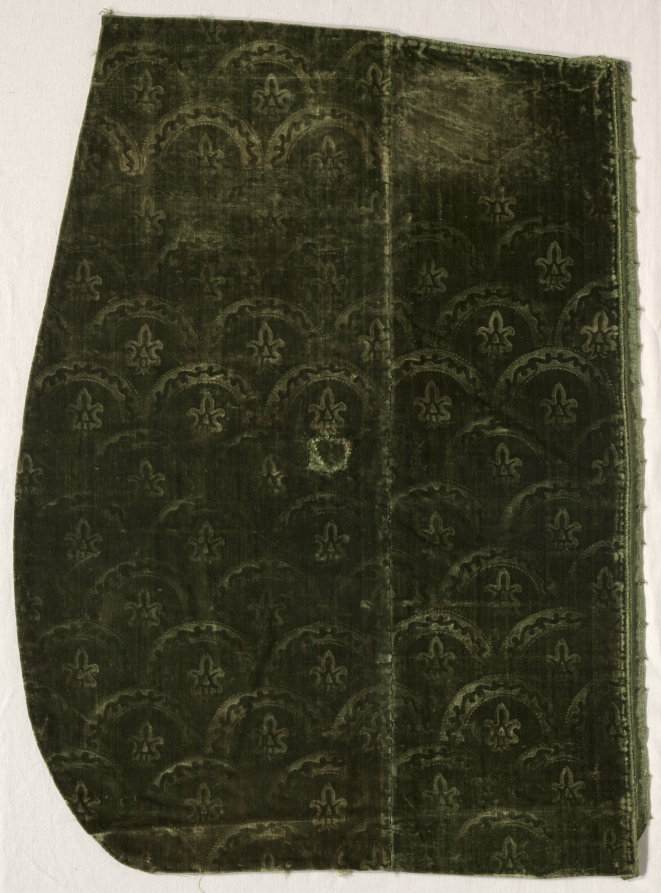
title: Fragment of Stamped Velvet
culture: France or Spain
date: early 1600s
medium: stamped velvet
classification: Velvet